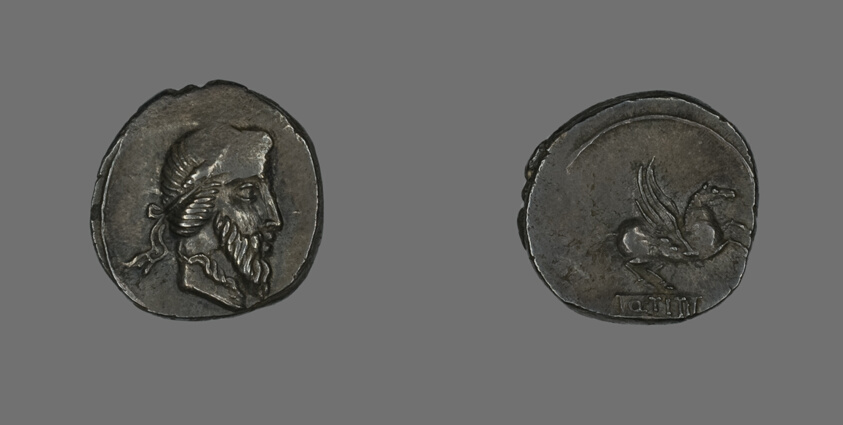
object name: Coin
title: Denarius (Coin) Depicting a Bearded Man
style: roman (ancient, style or period), ancient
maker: Roman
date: about 90 BCE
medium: Silver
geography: Roman Empire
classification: coin; ancient art